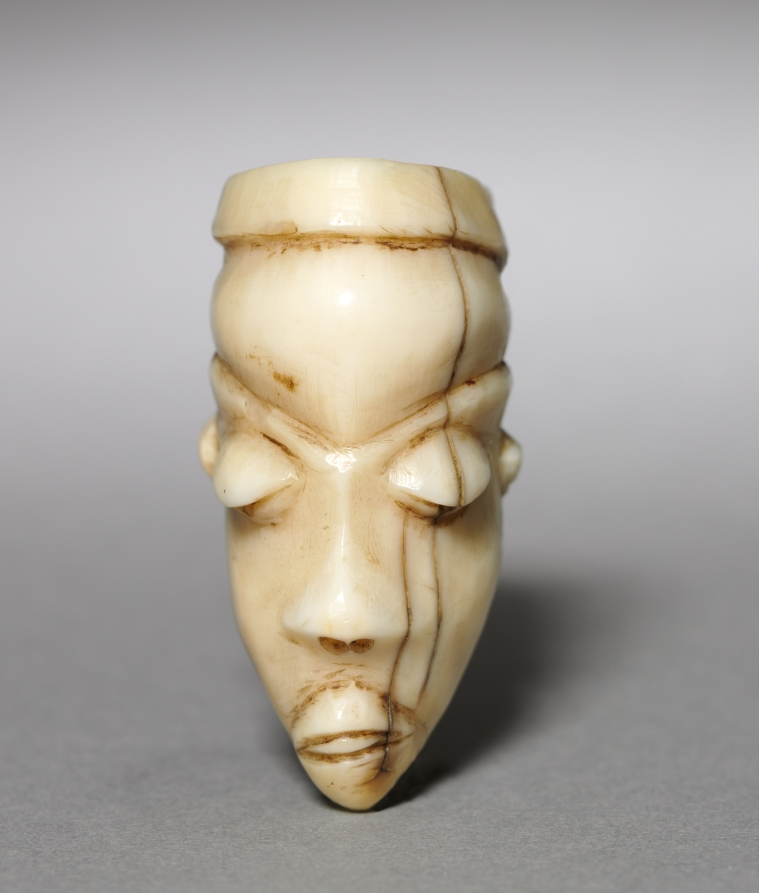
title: Pendant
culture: Central Africa, Democratic Republic of the Congo, Pende, 19th century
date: late 1800s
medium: ivory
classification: Jewelry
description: Pendants like these were worn as symbols of protection.